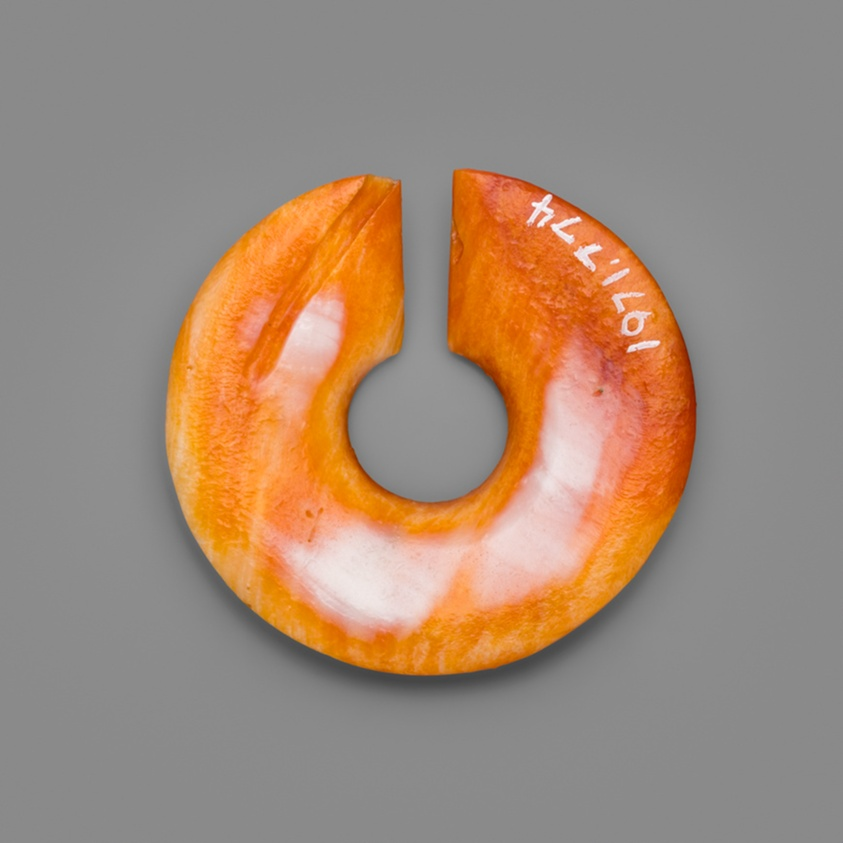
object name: Costume and Accessories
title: Circular Nose Ornament Incised with Concentric Bands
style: coclé, Pre-Columbian, americas, lower central america, Arts of the Americas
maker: Coclé (Venado Beach, Coclé province, Panama)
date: 800–1200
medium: Spondylus shell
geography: Venado Beach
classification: jewelry; shell; art of the americas; costume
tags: geometric, costume